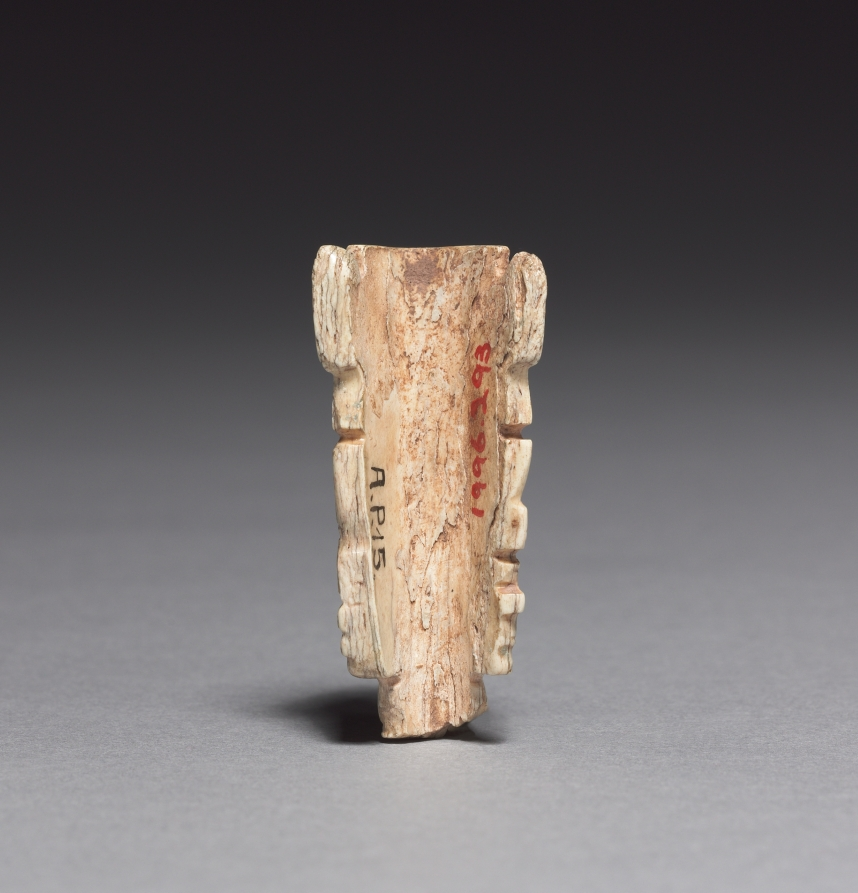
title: Sacrificer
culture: Bolivia, Peru or Chile, Southern Highlands, early Tiwanaku style, 400-1000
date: 400–1000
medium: carved bone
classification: Sculpture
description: Holding an axe in one hand, a human head in the other, this figurine depicts a ritual sacrificer. His fierce mask probably portrays either a puma or a fox. Incised patterns on the figure's body and headdress indicate elaborate tapestry garments. The ancient rituals embodied by this small carving must have been both visually spectacular and emotionally powerful.